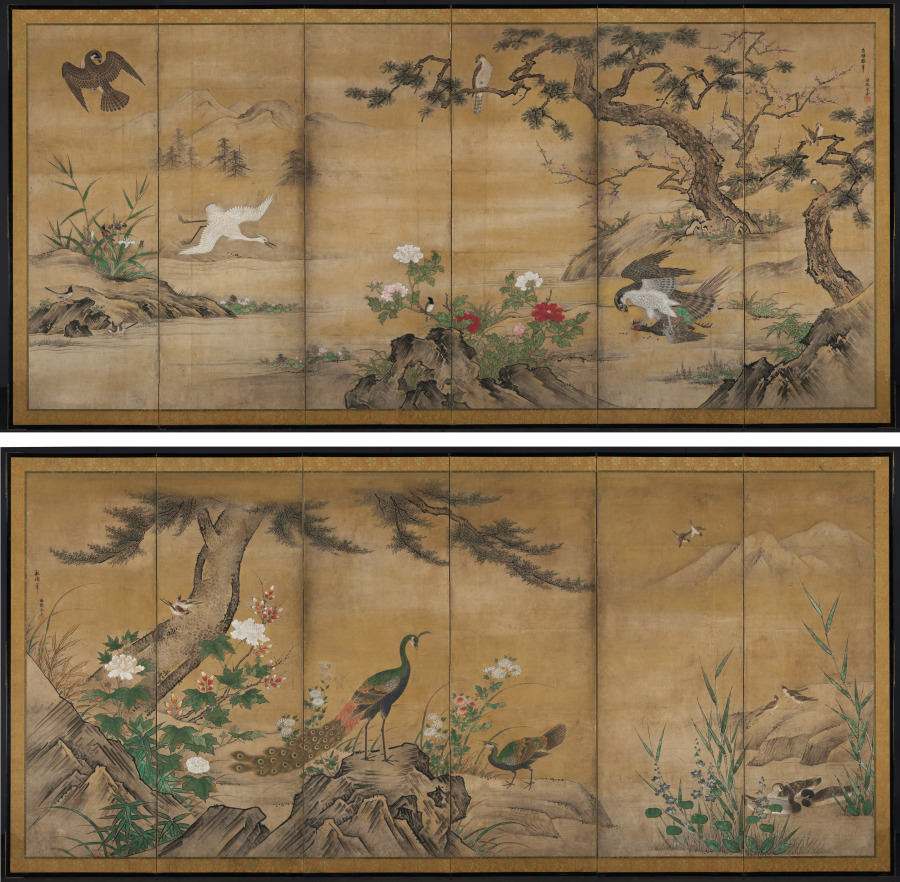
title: Birds and Flowers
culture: Japan, Momoyama period (1573–1615)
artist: Kano Mitsunobu (Japanese, 1565–1608)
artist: and Kano Shōei (Japanese, 1519–1592)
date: late 1500s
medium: Pair of six-panel folding screens; ink, color, and gold on paper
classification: Painting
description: The landscape depicted in this pair of screens follows a seasonal progression from right to left, starting with the blossoming plum of early spring and ending with late autumn peonies. A variety of smaller birds are positioned throughout the scene, and a trio of swimming ducks is bracketed by early summer irises and early autumn bellflowers at the center. While some raptors (birds of prey) terrorize a pheasant and an egret (a waterfowl) to the right, a peacock and peahen converse to the left. Hawks are associated with military prowess, while the peafowl suggest cultural prestige.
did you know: The inscriptions on these screens are not signatures of the artist, but instead an attribution to the painter Kano Eitoku (1543–1590) by his youngest brother, Kano Naganobu (1577–1654).